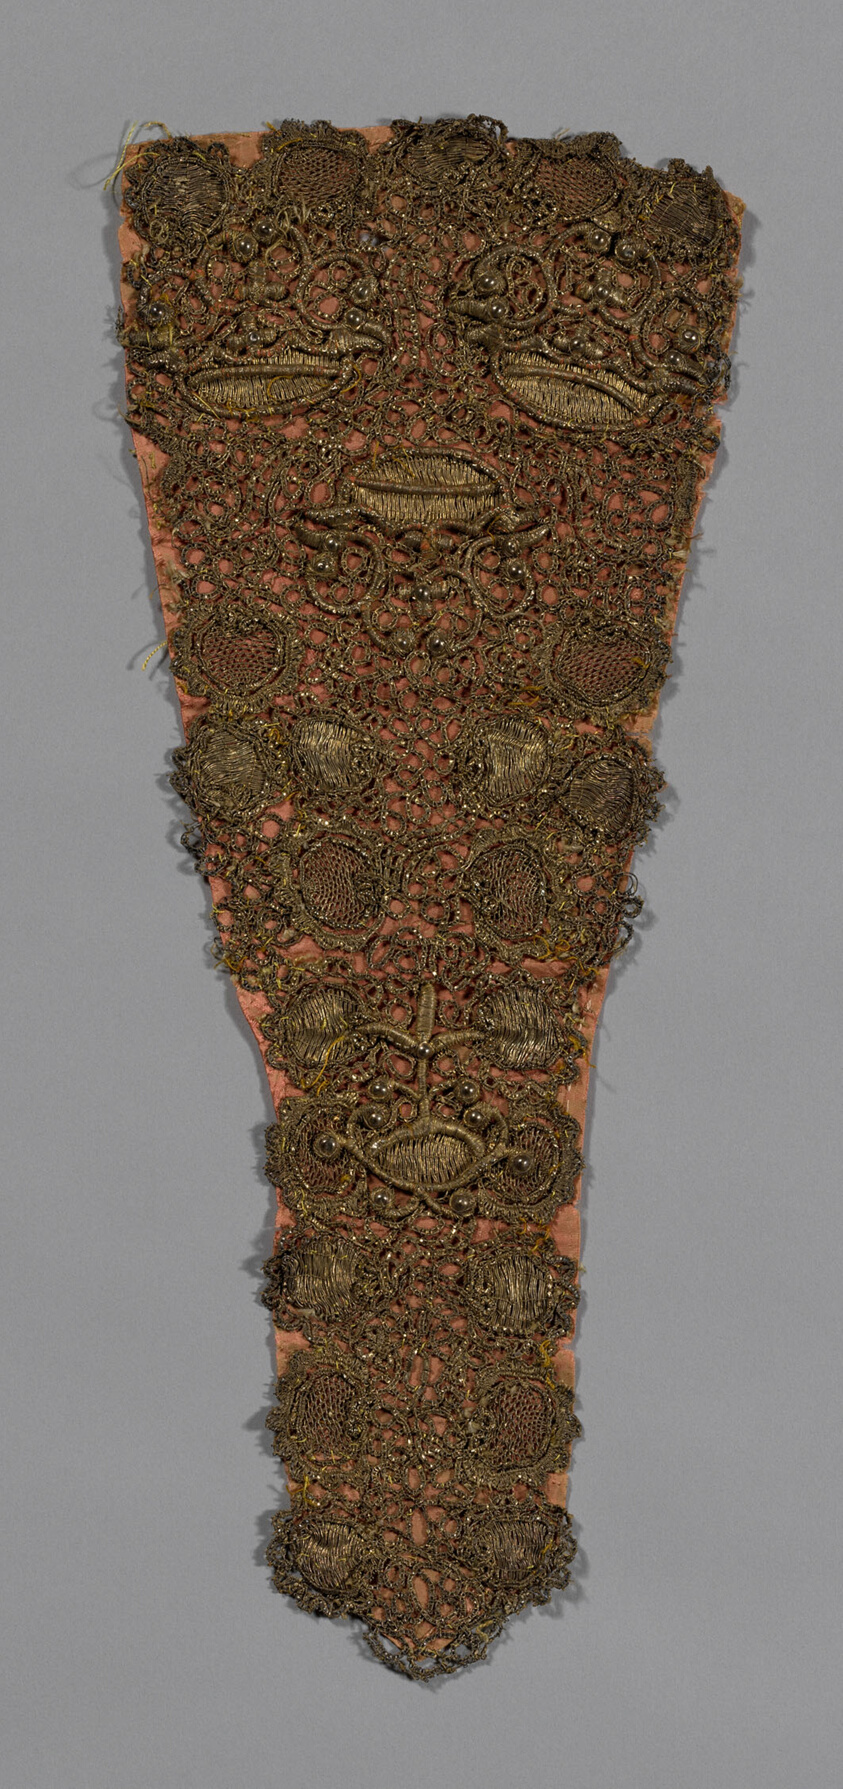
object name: Textile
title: Stomacher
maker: Norway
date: 18th century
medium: Silk, plain weave with gilt-metal-strip-wrapped silk, bobbin lace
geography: Norway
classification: textile; lace - bobbin